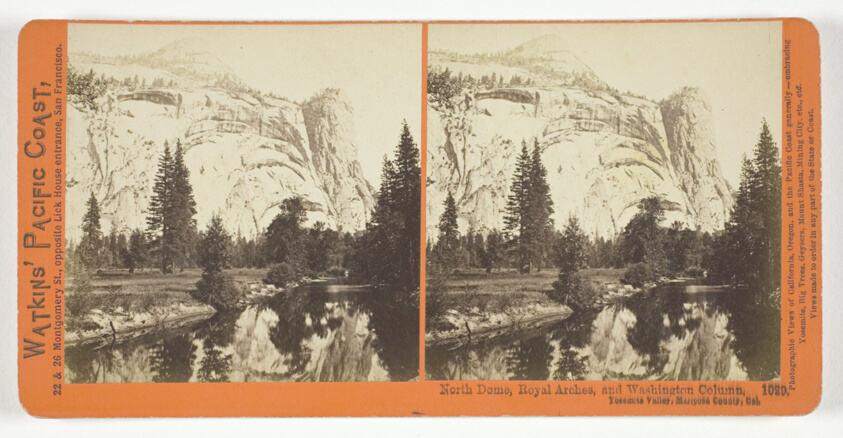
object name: Photograph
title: North Dome, Royal Arches and Washington Column, Yosemite Valley, Mariposa County, Cal., No. 1029 from the series "Watkins' Pacific Coast"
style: 19th century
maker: Carleton E. Watkins; American, 1829-1916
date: 1861/76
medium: Albumen print, stereo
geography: United States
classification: stereograph (albumen); albumen silver print; photographic process; photography; photograph